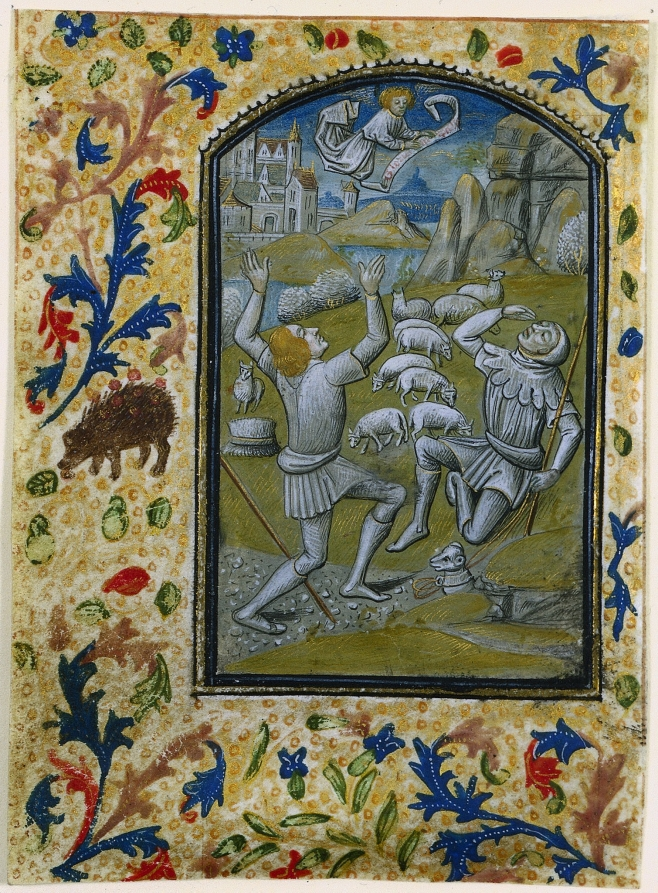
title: Leaf from a Book of Hours: Annunciation to the Shepherds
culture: Flanders, Bruges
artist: Guillaume Vrelant (Flemish, c. 1454–1481)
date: c. 1470–1480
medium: tempera, liquid gold, and grisaille on vellum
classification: Manuscript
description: Guillaume Vrelant, born in Utrecht, was known to be in Bruges from 1454 onward where he died around 1481. He probably went there to sidestep a 1427 law which banned the sale of Utrecht images. A painter very much in vogue, he founded the Illuminators’ Guild in Bruges under the patronage of Saint John the Evangelist. He is known to have provided manuscripts to the Burgundian court.